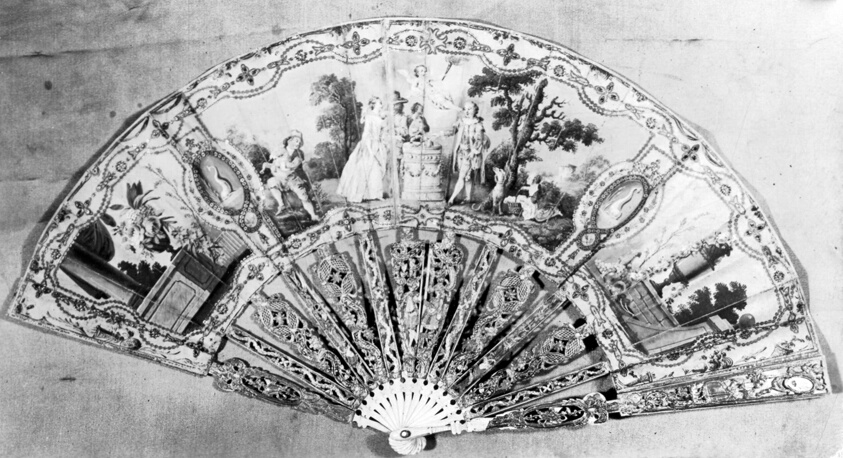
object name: Costume and Accessories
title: Fan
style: louis xvi, european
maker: France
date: 18th century, Louis XVI period (1774–1793)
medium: Painted silk mount and decorated with spangles; ivory sticks and guards encrusted with gold and silver; small mirrors in guards; blue stone rivet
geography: France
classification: textile; fan - needlework; costume accessory - folding fan; costume accessory; costume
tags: marriages/weddings, kings, Louis xvi, Marie Antoinette, queens, weddings